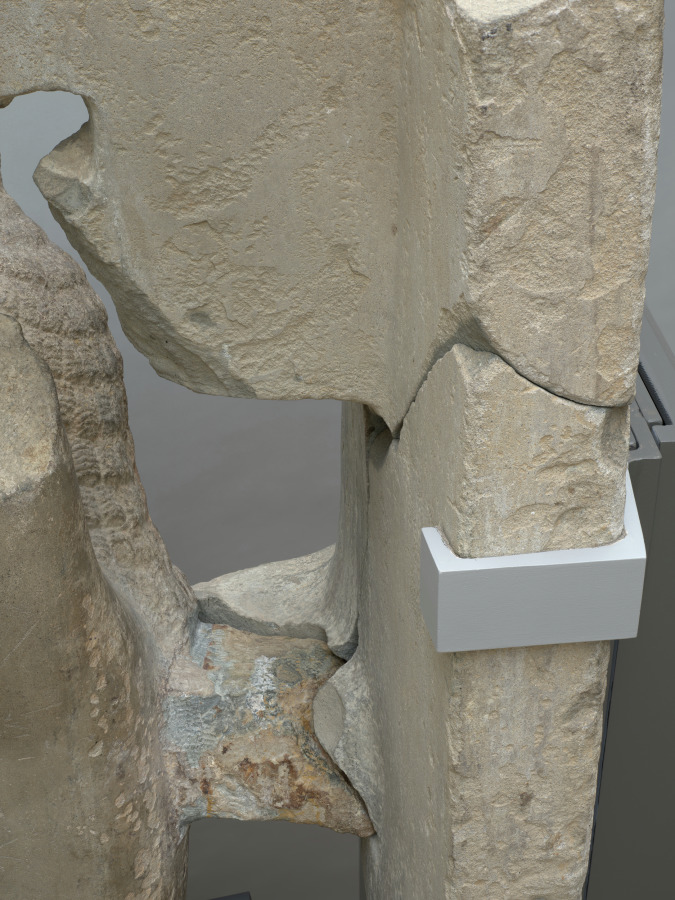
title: Krishna Lifting Mount Govardhan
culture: Southern Cambodia, Takeo Province, Phnom Da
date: c. 600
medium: Sandstone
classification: Sculpture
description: This masterwork of early Cambodian sculpture shows the Hindu god Krishna effortlessly holding aloft a mountain to protect his fellow villagers and herds from torrential storms sent by a jealous old god. It is one of eight monumental monolithic figures recovered from a two-peaked mountain in the floodplains of the Mekong River delta, on the outskirts of the ancient urban center of Angkor Borei.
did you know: Gold earrings were once fastened to the sculpture using holes in the figure's earlobes.